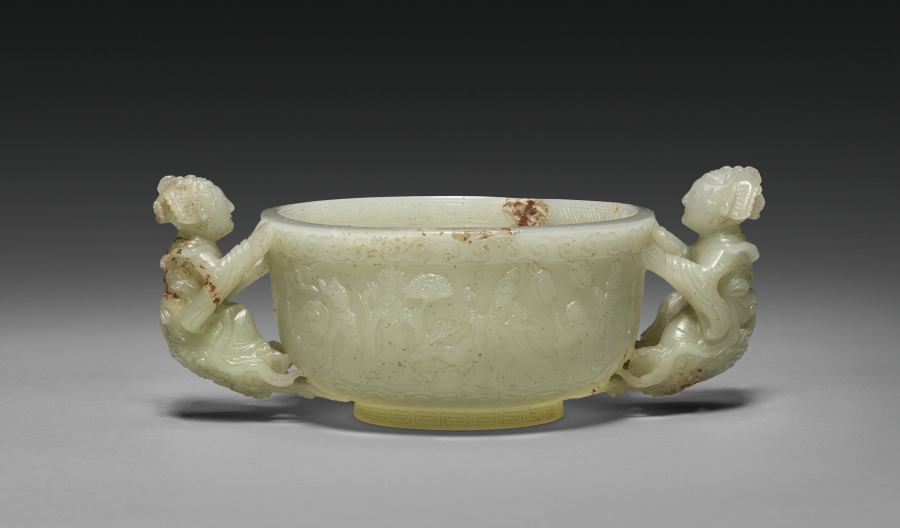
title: Cup with Daoist Figures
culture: China, Qing dynasty (1644–1911), Qianlong period (1736–95)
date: 1736–95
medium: Pale greenish-white jade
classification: Jade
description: During the Qing dynasty, Suzhou’s best products were sent north to the capital. Those that met imperial approval were sometimes graced with Qianlong’s mark, added by calligraphers and jade workers at court. The lack of a Qianlong mark on the Cleveland cup suggests that it might not have reached the court. Previously dated to the Yuan dynasty (1271–1368), new scholarship dates this cup to the Qing period.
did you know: Two female immortals serve as handles, while a Daoist procession with immortals, musicians, and attendants winds around the body of the cup.